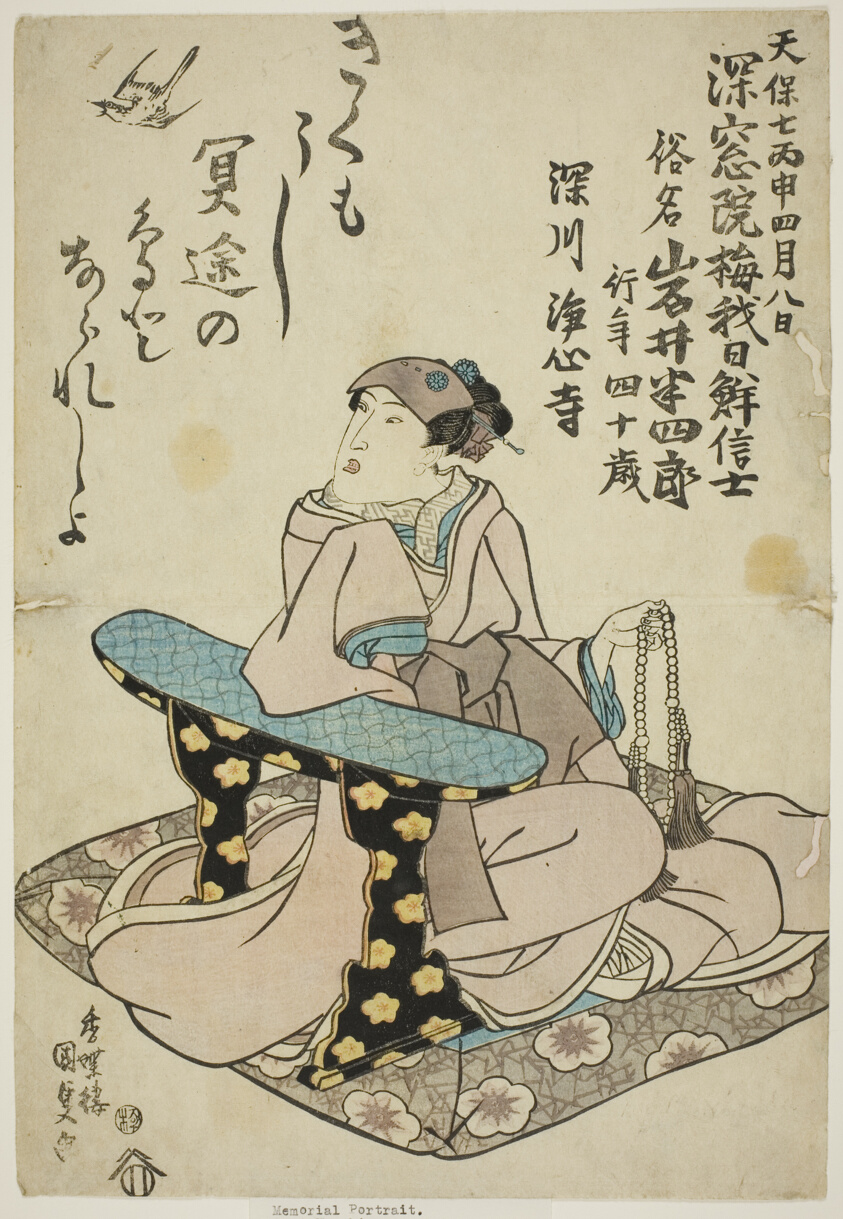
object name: Print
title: Memorial Portrait of the Actor Iwai Hanshiro VI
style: Japanese (culture or style)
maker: Utagawa Kunisada I (Toyokuni III) (Japanese, 1786-1864)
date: 1836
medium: Color woodblock print; oban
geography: Japan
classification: print; asian art